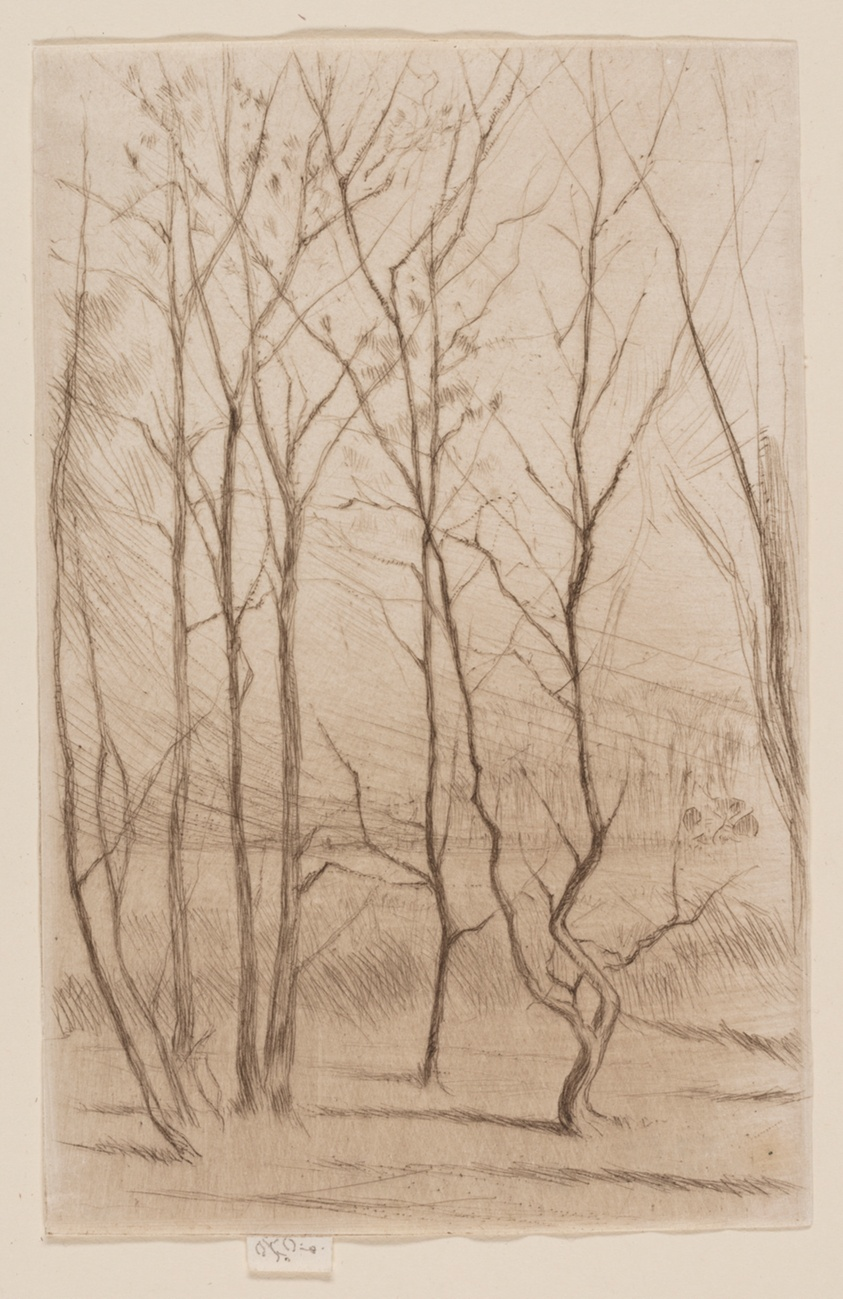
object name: Print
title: The Dam Wood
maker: James McNeill Whistler (American, 1834-1903)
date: 1874/75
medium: Drypoint in brown ink on off-white wove paper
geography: United States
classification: drypoint; print; prints and drawing; paper